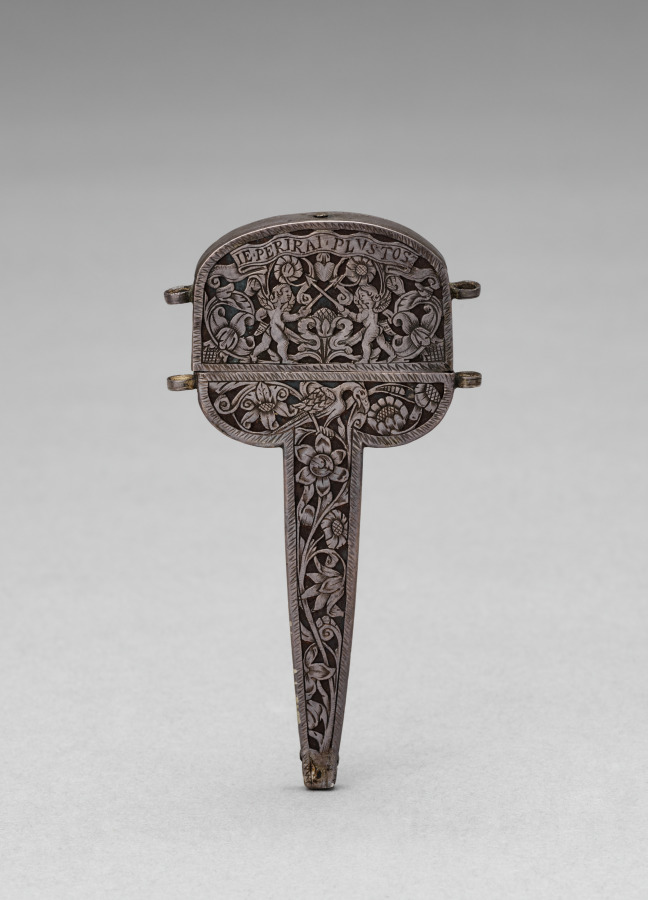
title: Scissors Case (Etui)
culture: The Netherlands or France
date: c.1690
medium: silver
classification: Silver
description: Attached to a belt loop, silver scissor cases were practical fashion accessories. Intricately designed and expensively produced, they demonstrated the wealth of a wearer. Cases like this one were often decorated with motifs of love and given as traditional wedding or engagement gifts. On one side of this case, two putti raise a heart above their heads, on the other they defend it with a pair of crossed spears.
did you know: The inscription on this scissor box reads “TOVS. OV. RIEN” (all or nothing) on one side and “IE. PERIRAI. PLVSTOS” (I would rather die) on the other.